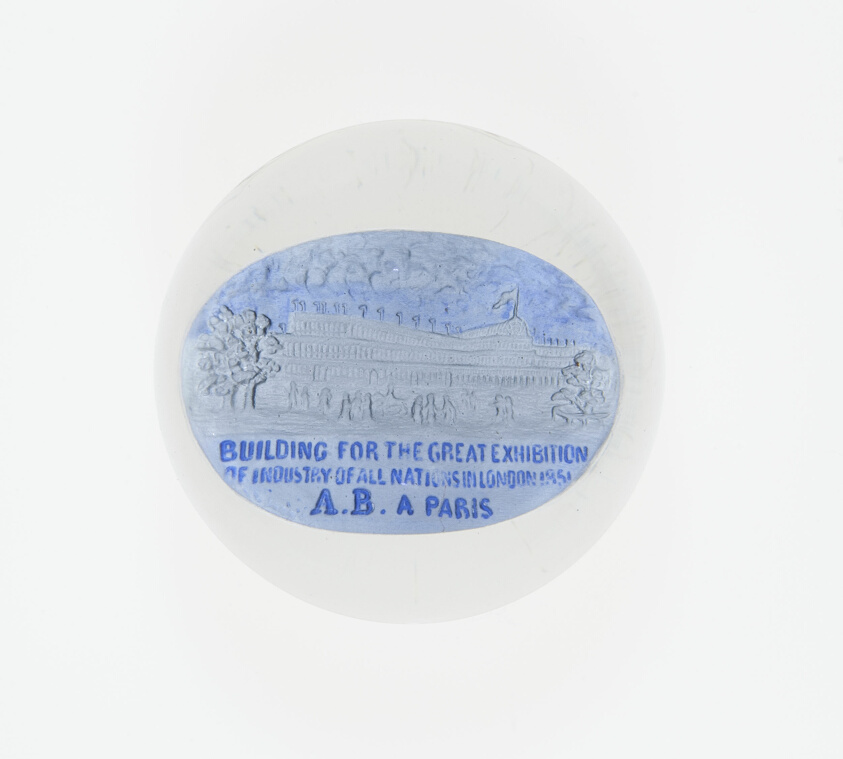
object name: Glass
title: Paperweight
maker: Paris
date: 1851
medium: Glass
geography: Paris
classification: paperweight; sulphide (glass); european decorative arts; glass